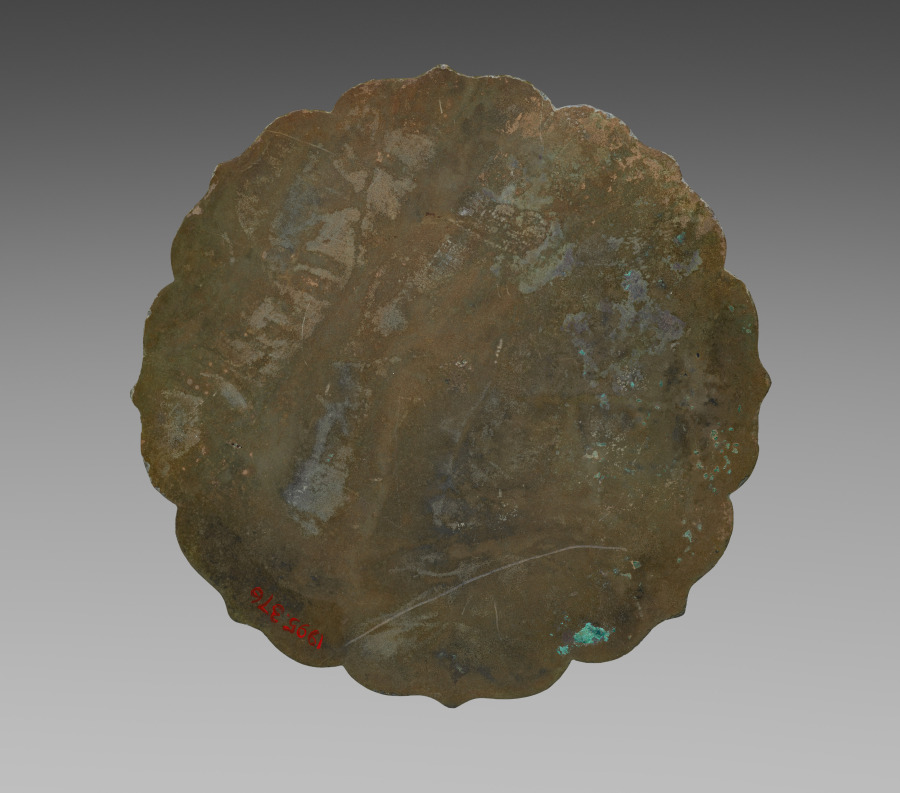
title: Octafoil-shaped Mirror Featuring Ci Fei, the Dragon Slayer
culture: China, Jin dynasty (1115-1234) or Korea, Goryeo dynasty (918-1392)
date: 900s–1300s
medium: bronze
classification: Metalwork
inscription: 煌丕昌天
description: The mythical hero Ci Fei and his victory during his travel through the Yangzi River is depicted on this eight-lobbed mirror. He raises his sword in order to attack sea monsters. On the top, a large inscription in seal script reads “Great and Resplendent is the Heaven.” The mirror is currently thought to be a Chinese work dating to the Jin Dynasty (1115-1234). Recently published excavation reports, however, reveal that this particular type was exclusively unearthed from Korean tombs of the Goryeo period. Some Korean scholars speculate that this Chinese epic was appropriated to celebrate the Goryeo ruling house’s heroic ancestry and this type of mirror was widely distributed as a token of power among Goryeo elite class members.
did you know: The mirror is currently thought to be a Chinese work dating to the Jin Dynasty (1115-1234). Recently published excavation reports, however, reveal that this particular type was exclusively unearthed from Korean tombs of the Goryeo period.